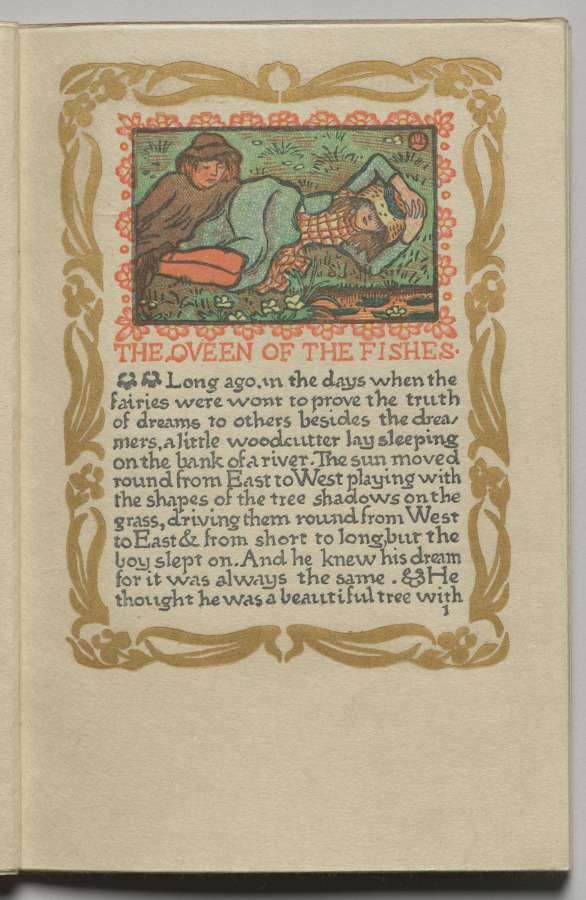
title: The Queen of the Fishes: Plate 1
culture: England, 19th century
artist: Lucien Pissarro (British, 1863–1944)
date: 1894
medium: color woodcut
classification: Bound Volume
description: Pissarro, son of the French Impressionist artist Camille Pissarro, moved to England in 1890. By 1894 he and his wife, Esther Bensusan Pissarro, had bought a printing press and established the Eragny Press. Influenced by William Morris, they were involved in every step of the production process: designing, cutting the woodblocks, setting type, and printing. The first book published by Ergany Press, The Queen of the Fishes, is based on an old fairy tale in which a peasant boy and girl escape the hardships of their lives by fantasizing that they have been turned into a giant oak and a splendid fish, respectively.